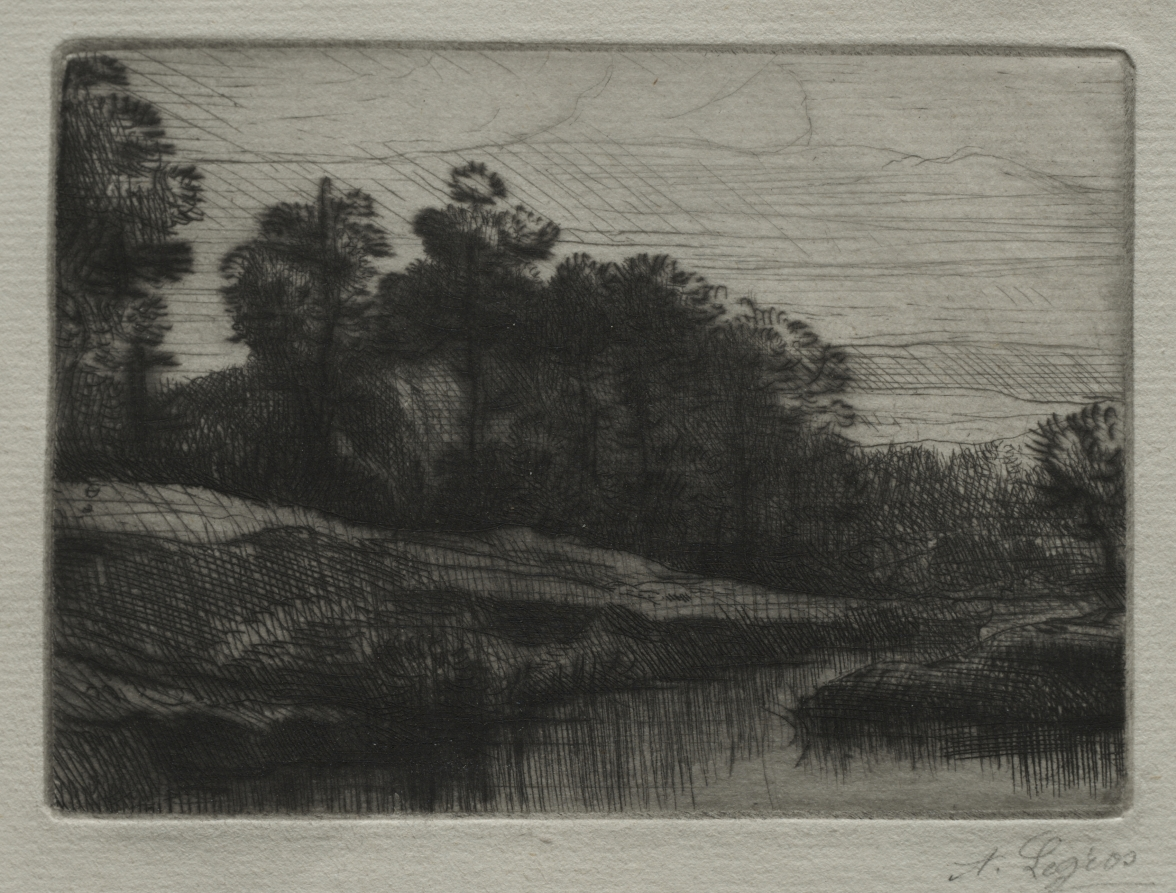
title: Evening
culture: France, 19th century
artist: Alphonse Legros (French, 1837–1911)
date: c. 1857–1911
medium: drypoint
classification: Print